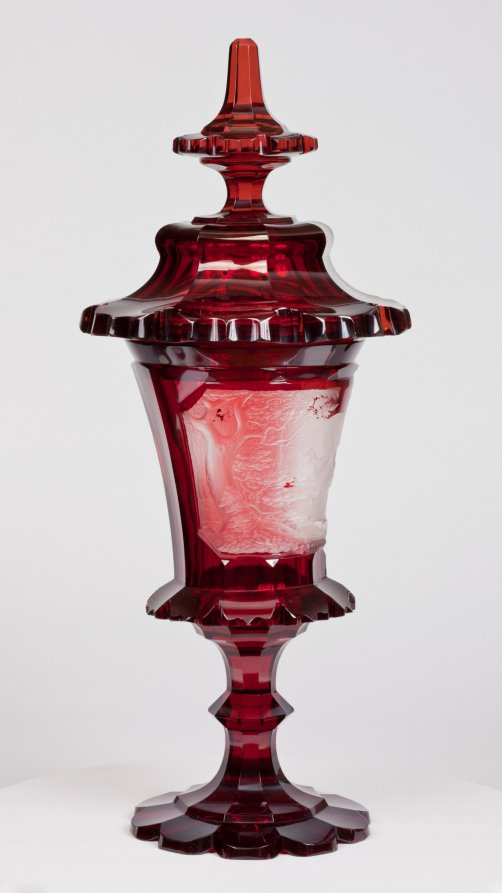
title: Covered Cup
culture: Bohemia, 19th century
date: mid-1800s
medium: ruby glass with engraved decoration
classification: Glass